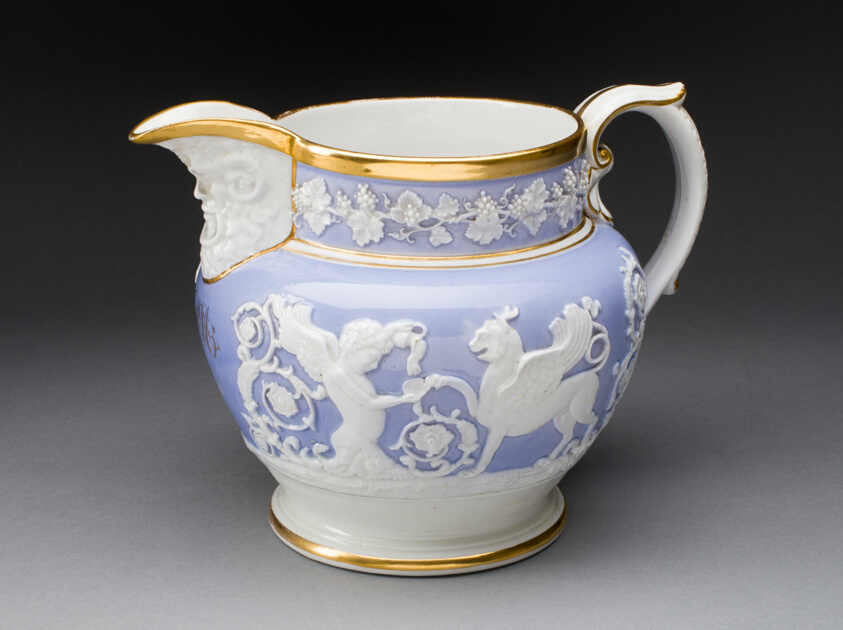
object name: Ceramics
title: Pitcher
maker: England, Staffordshire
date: c. 1840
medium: Porcelain with blue glaze and gilding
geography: Staffordshire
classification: pitcher (vessel); porcelain; vessel; european decorative arts; ceramics